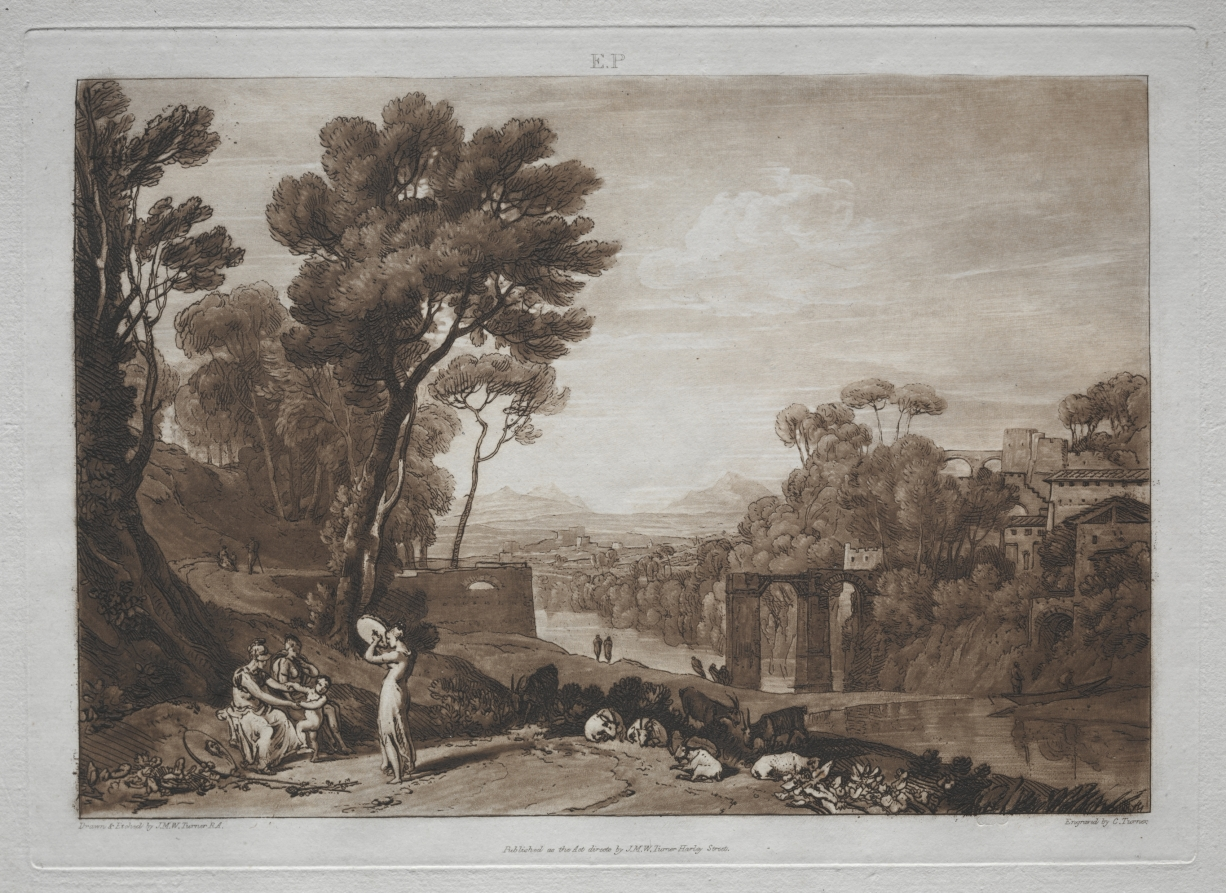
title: Liber Studiorum: The Woman and the Tambourine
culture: England, 19th century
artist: Joseph Mallord William Turner (British, 1775–1851)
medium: etching and mezzotint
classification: Print